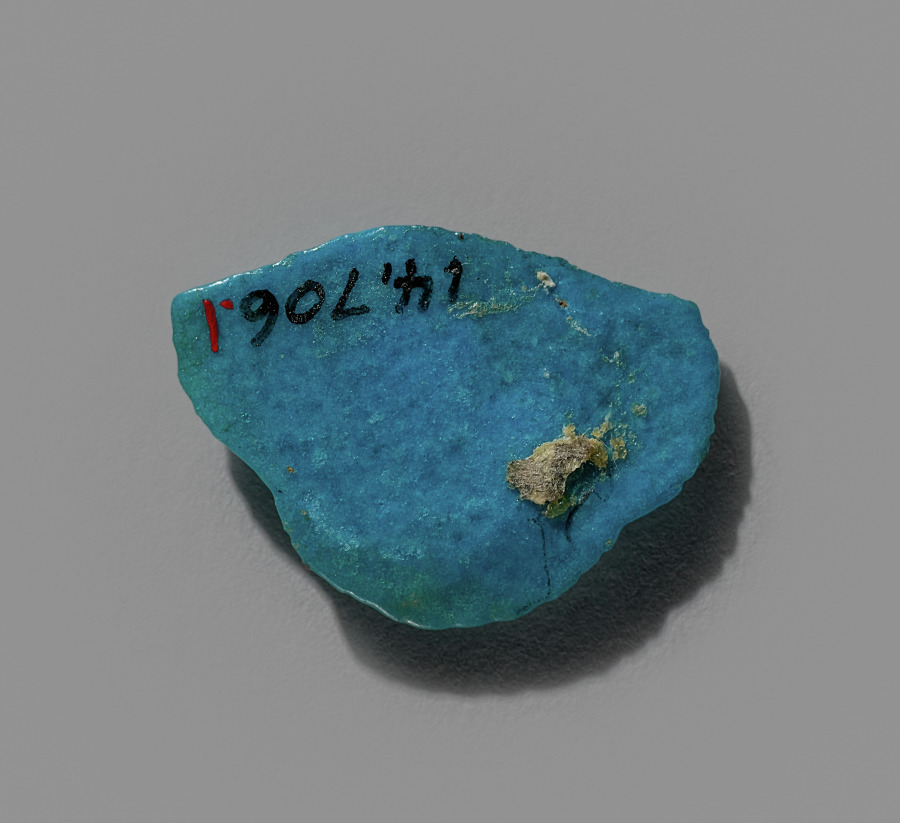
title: Food Model Amulet: Calf's Head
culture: Egypt, New Kingdom (1540–1069 BCE), Dynasties 19–20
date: 1295–1069 BCE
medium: turquoise faience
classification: Amulets